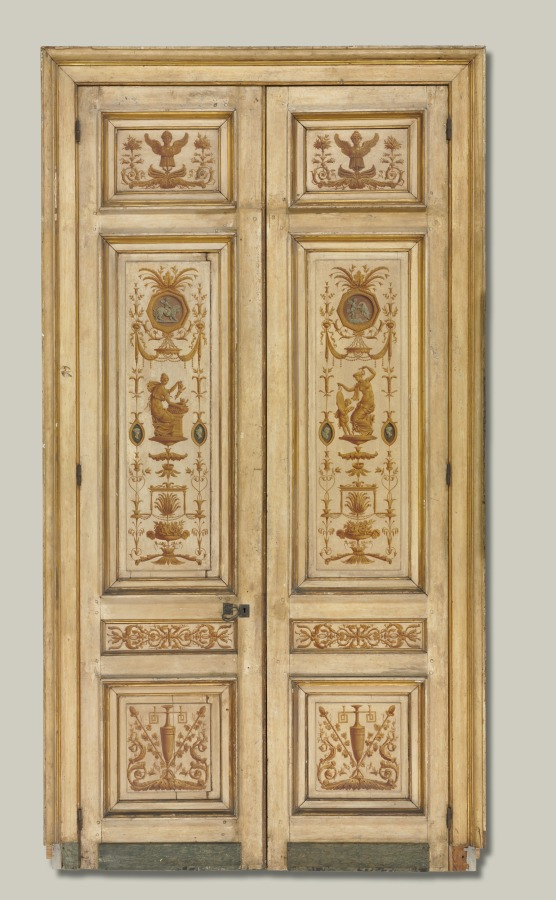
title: Overdoor Painting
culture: France, 18th century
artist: Pierre Rousseau (French, 1751–1829)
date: 1790s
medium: oil on canvas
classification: Painting